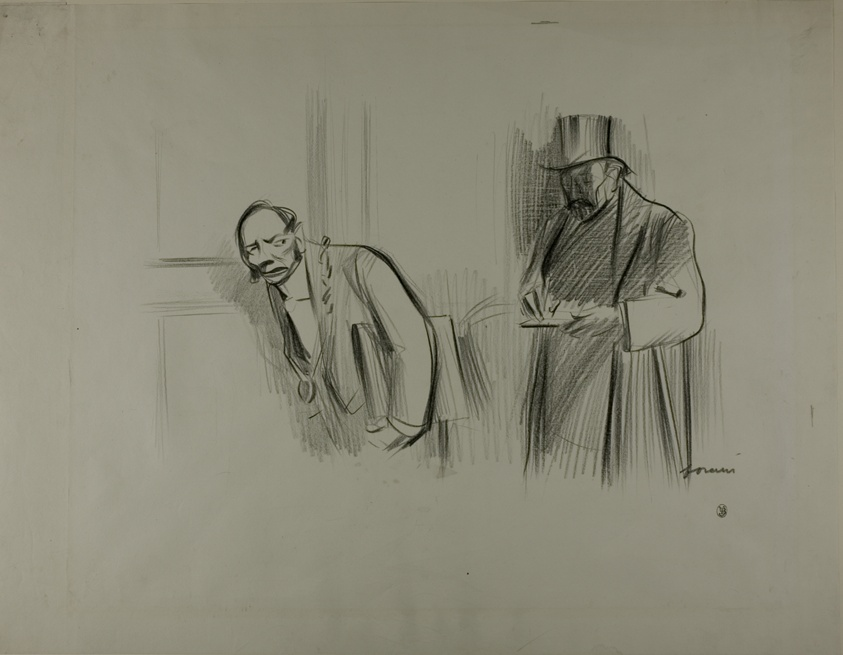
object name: Print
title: The Reporter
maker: Jean Louis Forain (French, 1852-1931)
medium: Lithograph on off-white wove paper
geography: France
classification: lithograph; print; prints and drawing